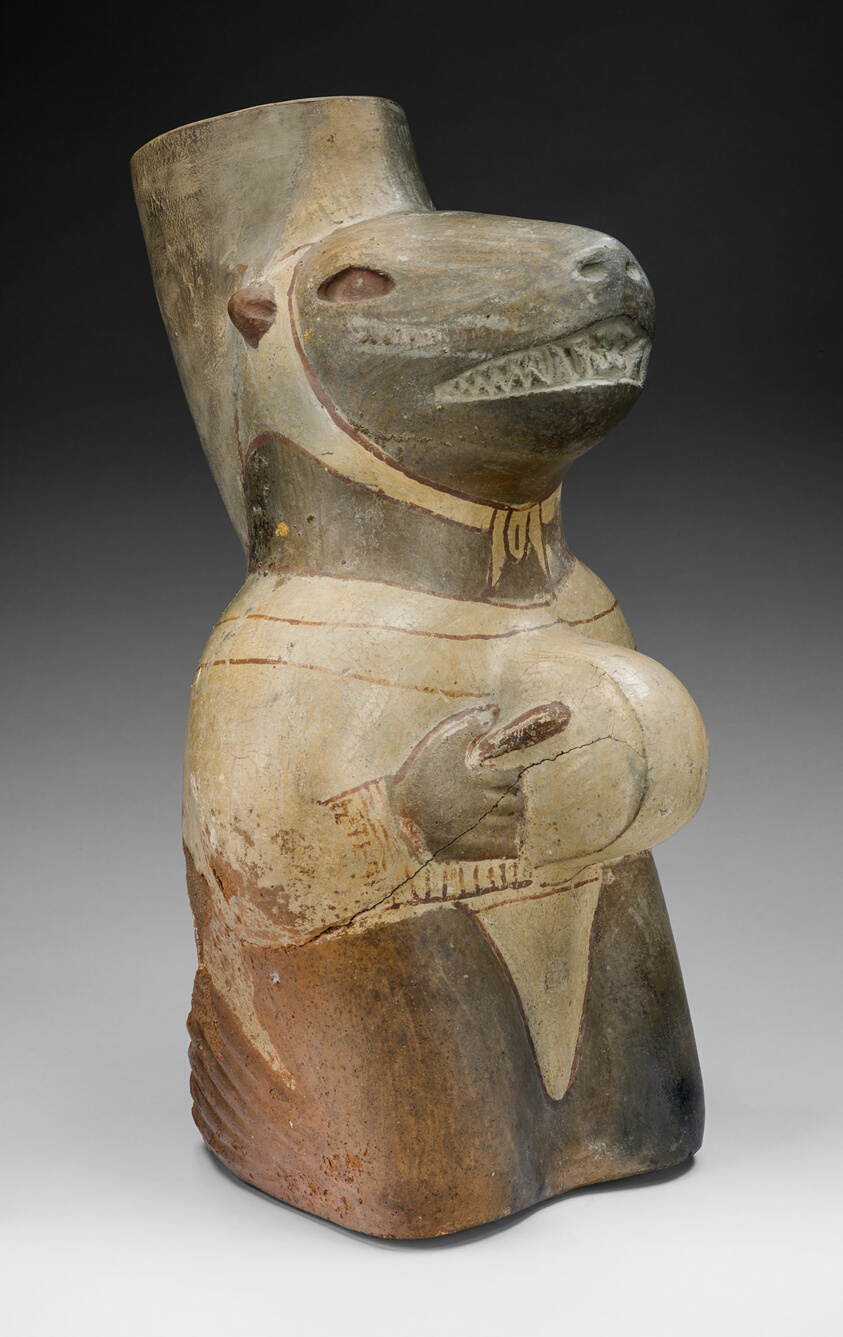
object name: Vessel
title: Vessel in the Form of a Seal Impersonator Playing a Drum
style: moche, mochica v, mochica, early intermediate period, Pre-Columbian, americas, andes, Arts of the Americas, andean, south american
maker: Moche (North coast, Peru)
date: 100 BCE–500 CE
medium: Ceramic and pigment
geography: Peruvian North Coast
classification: earthenware; ceramics; vessel; art of the americas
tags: animals, impersonation